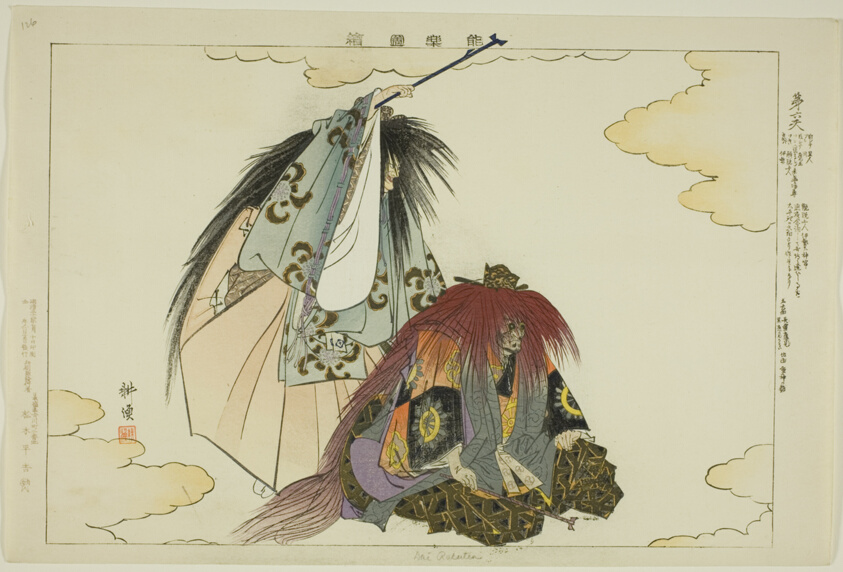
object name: Print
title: Dai Rokuten, from the series "Pictures of No Performances (Nogaku Zue)"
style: Japanese (culture or style)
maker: Tsukioka Kogyo; Japanese, 1869-1927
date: 1898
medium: Color woodblock print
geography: Japan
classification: woodblock print; print; asian art